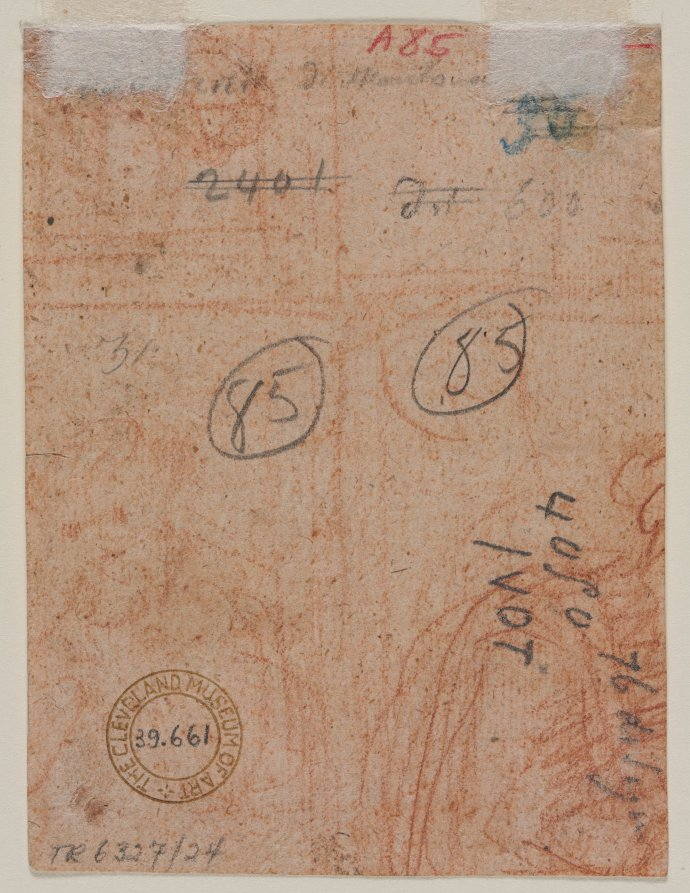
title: Fragment of Two Figures (verso)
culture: Italy, 16th century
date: 16th century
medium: red chalk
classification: Drawing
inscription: upper center, in red pencil: A 85 ; upper center, in graphite: [illegible] [Il?] [Mantova?] ; upper right, in blue pencil: 36 [crossed out in graphite] ; upper center, in graphite: 2401 [crossed out] ; upper center, in graphite: [illegible] [crossed out] ; upper right, in graphite: 600 ; upper center, in graphite(?): [19?] ; center left, in graphite: 31 ; center, in graphite: 85 [circled] ; center right, in graphite: 85 [circled] ; lower right, in graphite: 76 [disegno?] / 40[5?]0 / IVOT [all sideways]